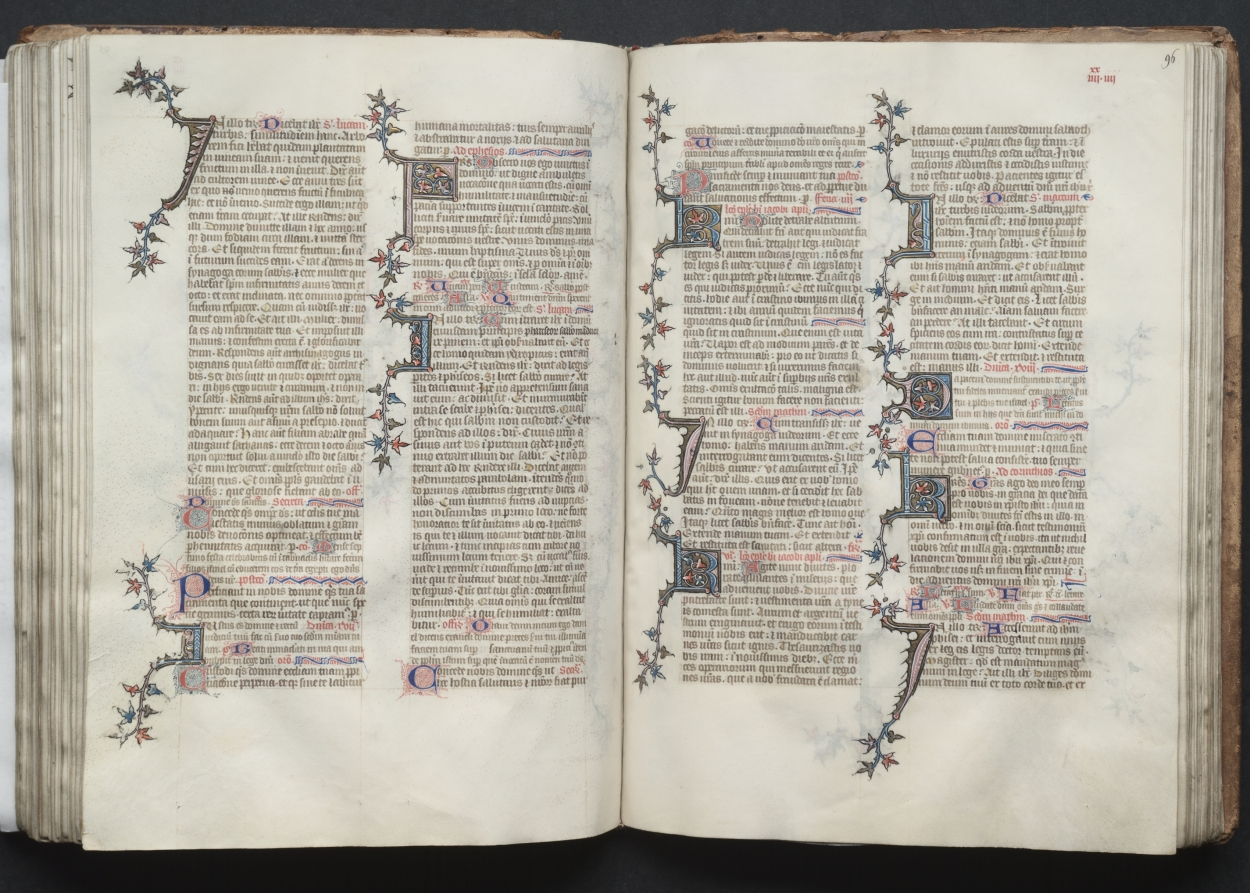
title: The Gotha Missal: Fol. 95v, Text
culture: France, Paris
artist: Master of the Boqueteaux (French)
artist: and Workshop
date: c. 1375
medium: ink, tempera, and gold on vellum; blind-tooled leather binding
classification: Bound Volume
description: The style and quality of this manuscript's decoration is typical of deluxe Parisian books made for aristocratic or royal patrons. Most of the book's decoration appears to be the work of the Master of the Boqueteaux, an artist active at the court of King Charles V (died 1380). His style was apparently shared by a number of book illuminators working in and around Paris. It is very possible that the Gotha Missal belonged to Charles V, but is not provable because the manuscript has no royal portraits and lacks a colophon. Given the book's magnificent decoration, however, it would seem that it was produced for a Valois prince, if not for the king himself. The manuscript receives its name from the German dukes of Gotha, its later owners.